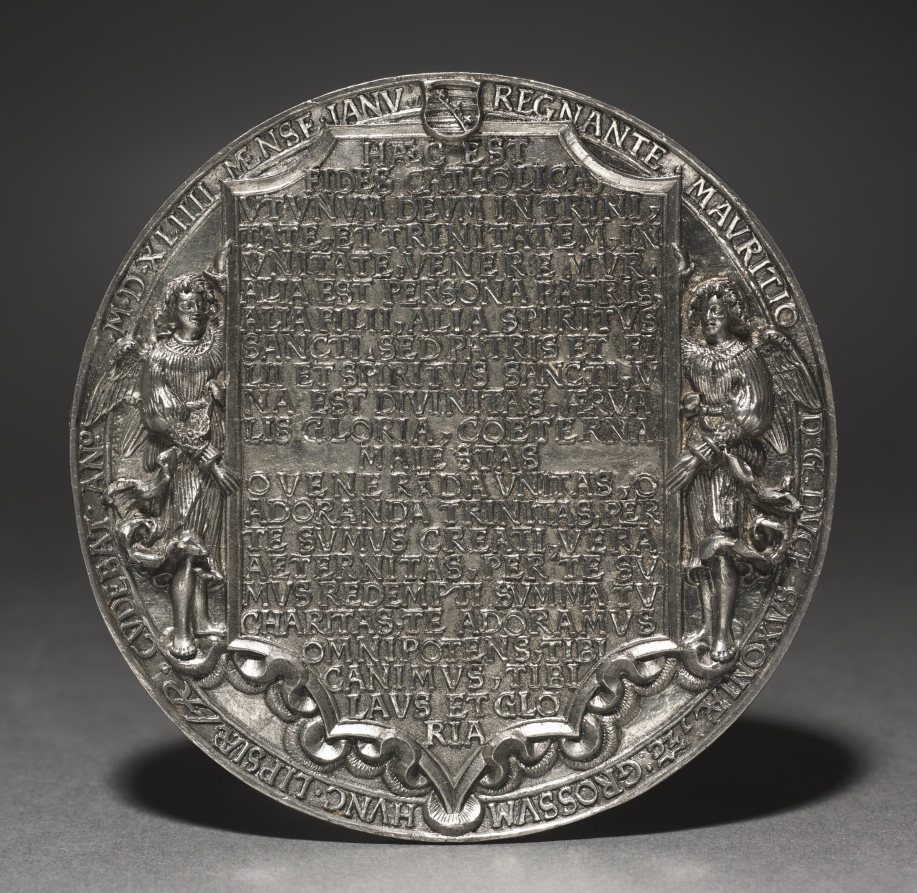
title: The Trinity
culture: Germany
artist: Hans R. Reinhart (German, c. 1500–1581)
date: 1544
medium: silver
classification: Sculpture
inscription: below the cross and on the reverse are incised the letters: H. R.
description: Commissioned by Duke Moritz of Saxony, this medal depicts the Trinity in the form of the Throne of Grace. God the Father holds the cross on which Christ has been crucified, expressing God’s acceptance of Christ’s sacrifice, with the Holy Spirit between them in the form of a dove.